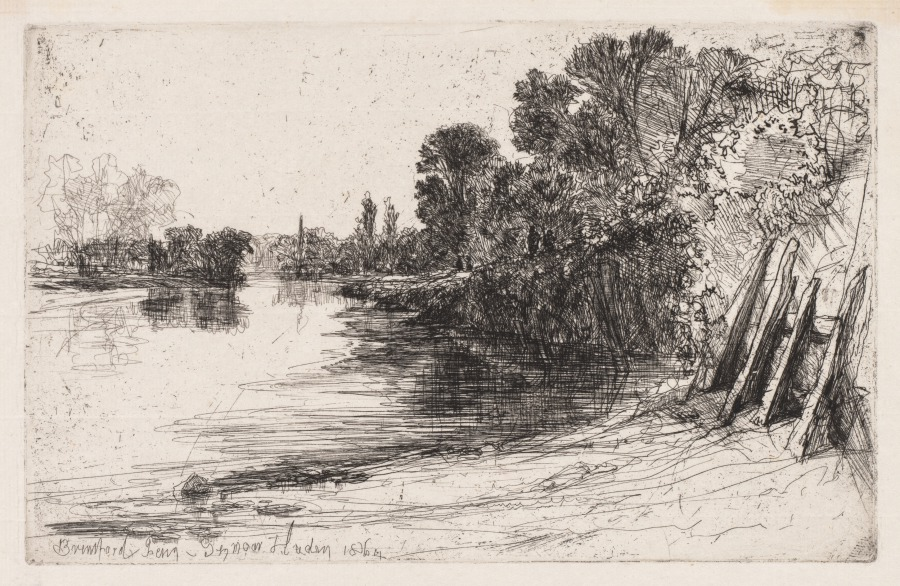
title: Brentford Ferry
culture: Britain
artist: Francis Seymour Haden (British, 1818–1910)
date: 1864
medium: etching and drypoint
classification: Print